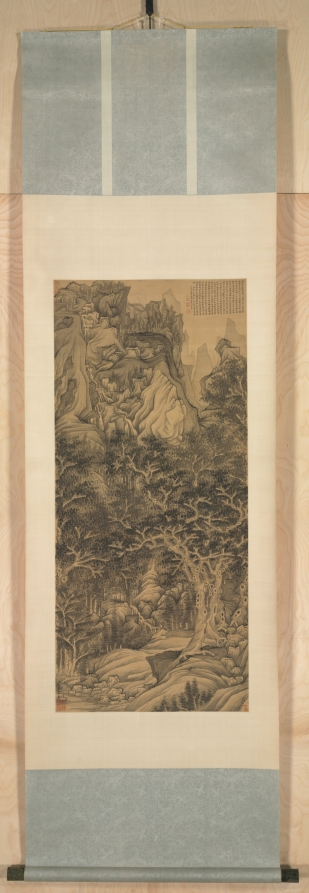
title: The Mountain of Five Cataracts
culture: China, Ming dynasty (1368–1644)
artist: Chen Hongshou (Chinese, 1598/99–1652)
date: c. 1630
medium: hanging scroll; ink on silk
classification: Painting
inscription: Artist's signature and seal at middle right edge: Hongshou [seal] Zhanghou 洪绶 [印]章侯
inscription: Inscription by Gao Shiqi 高士奇 (1645–1704): The Mountain of the Five Cataracts is bordered by three prefectures--Wu [Jinhua], Hang [Hangzhou], and Yue [Shaoxing]--and is quite close to Jiyang [Zhuji] in Yue. The landscape there is extraordinary and precipitous, with ridges and peaks standing in circles. Rocks of strange shapes gaze down everywhere, while maple and bamboo provide shade. The water from five pools overflows and is suspended in five steps--that is why it is called "Five Cataracts." Xie Yuanqing [Xie Tiao 謝朓, c. 464–499] of the Qi Dynasty gathered medicinal herbs here; Diao Jingchun [Diao yue 刁約, 11th century] of the Song Dynasty also visited here; Song Jinhua [Song Lian 宋濂, 1310–1381] and Xu Tianchi [Xu Wei 徐渭, 1521–1593] both wrote travel notes about the place; and Chen Hongshou painted here. His mountains are done in the style of the Six Dynasties masters; the trees are after those of Dong Beiyuan [董源 Dong Yuan, active during the Five Dynasties]--the painting seems to be richly imbued with the primeval spirit. Xu Wei said that the grotto is unique for the shade (yin) and the five cataracts unusual for the sun (yang). There are seventy-two peaks, with a ravine between two cliffs. At times they are bright and at other times, gloomy; sometimes they seem to be open, sometimes closed, yet often border uniquely between shady (yin) and sunny (yang). Zhanghou [Chen Hongshou] really succeeded in capturing that spirit. As a young man indulgently boating through Shanyin [Shaoxing],/ I became familiar with the beauty of the Five Cataracts./ The cold streams, when level, become pools clear as crystal./ Pouring foam mingled with flying waterfall,/ Its shapes constantly changing./ Water would flow downward without a sound,/ Or become raging billows emitting echoes./ Sometimes the wind from the sky would wail,/ The green forest during the day would turn dark./ Sometimes it was dangerous and difficult to ascend,/ For the moss was slippery on the stone steps in those precipitous cliffs./ After reading the travel notes of Sung [Lian] and Xu [Wei],/ I'm afraid their descriptions are incomplete. / Yet when Laolian [Chen Hongshou] was seized with the inspiration to paint,/ His brush and ink moved with exhilaration./ It is as if mists have risen/ From a hot cooking pot, gradually opened./ By hanging this on a plain wall,/ One can clearly listen to the quiet night./ At the end of the year, ice and snow are deep;/ The cold air in the quiet studio is frozen./ Near the fireplace, I make with it a silent, spiritual acquaintance/ Burning incense and striking a lucid qing [stone chime]. On the eighteenth day of the twelfth month in the jimao year of the Kangxi era [1699]. Jiangcun, Gao Shiqi. Zhuchuang inscribed this at Zhe in the Lan Jing studio. It was the third day after the beginning of spring. trans. LYSL/HK/WKH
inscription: Collector's inscription by Gao Shiqi 高士奇 (1645–1704), one column in standard script at the lower left corner: 信天巢秘藏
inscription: 5 seals of Gao Shiqi 高士奇 (1645–1704): 竹窗 Zhu Chuang; 高士奇 Gao Shiqi; 澹人 Danren; 簡靜齋 Jian Jing Zhai (Gao Shiqi's studio; at the upper left corner); 高氏江村草堂珍藏書畫之印 Gaoshi Jiangcun Caotang Zhencang shuhua zhi yin (at the lower left corner).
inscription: Two additional seals at the lower left and right corners are undecipherable.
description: A unique landscape painting in the existing body of Chen Hongshou’s art, this painting reveals his involvement with the practice of fang (imitation) to achieve creative transformation. Chen acquired the tradition stemming from Dong Yuan of the Five Dynasties, with which he sought an artistic individuality that lends his work an idiosyncratic vision and extraordinary power.